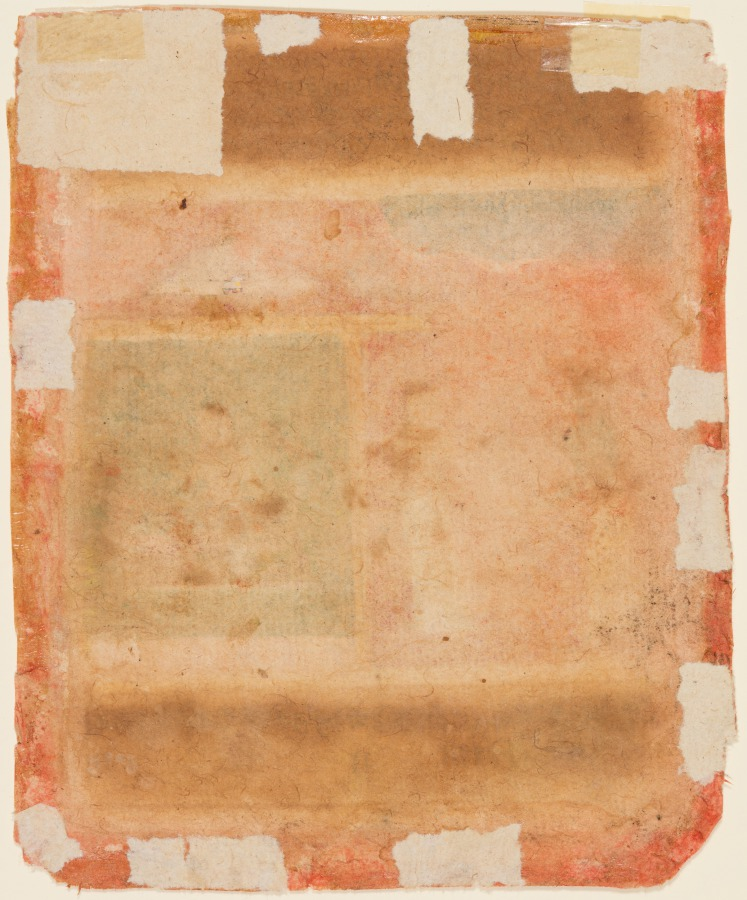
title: The Sentiment of Peace: Sama Rasa, from a Rasikapriya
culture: Central India, Madhya Pradesh, Malwa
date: 1634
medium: Gum tempera and gold on paper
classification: Painting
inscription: tha samarasa lakshana. savate hoi udāsa manu vasai eka hiṃ ṭhorā. tāhī soṃ samarasu kahai kesava kavi siramoura. radhikā kauṃ samarasu. dekheṃ nahiṃ araviṃdani tyoṃ vira vaṃda kī ānada kaṃda nikaī. kanana kamakatha karai kama na take tridhāma ki suṃdaritaī. dekhi gaī bhavateṃ tumakauṃ taba teṃ kachū vāhi na dekhyo suhaī. chādegī dehu ju dekheṃ binā aho dehu na kānha kahūṃ kai dikhaī. 21.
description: A lovesick heroine sits in a chamber with her head turned in disregard. A confidante (sakhi) explains her condition to Krishna and requests that he meet her. The sakhi raises her finger in concern and points toward the heroine with her other hand. Krishna, wearing Mughal turban and garments, gestures in agreement. The color palette is simple, and the composition is flat—hallmarks of early Malwa painting.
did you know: A peacock perches on the terrace of the heroine, accentuating her loneliness.